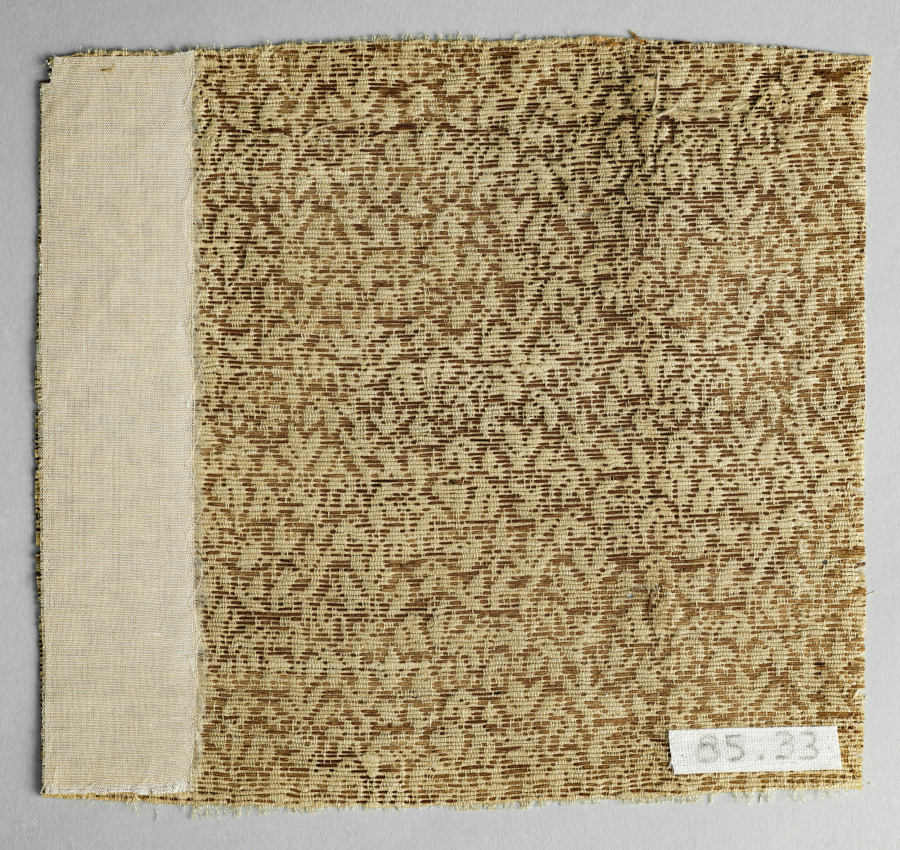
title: Textile with Tiny Leaves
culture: Central Asia, Il-khanid (Mongol) period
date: 1275–1350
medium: Silk and gold thread; tabby with supplementary weft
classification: Textile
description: The shimmering gold of the tiny scattered leaves in this silk perfectly suited the taste of the Mongol court. Showing no Chinese or eastern Iranian influence, this type of pattern appears to have been indigenous to eastern Central Asia. The closest parallels to the tiny leaves densely strewn across the surface are found among the silk tapestries of the Uyghurs.